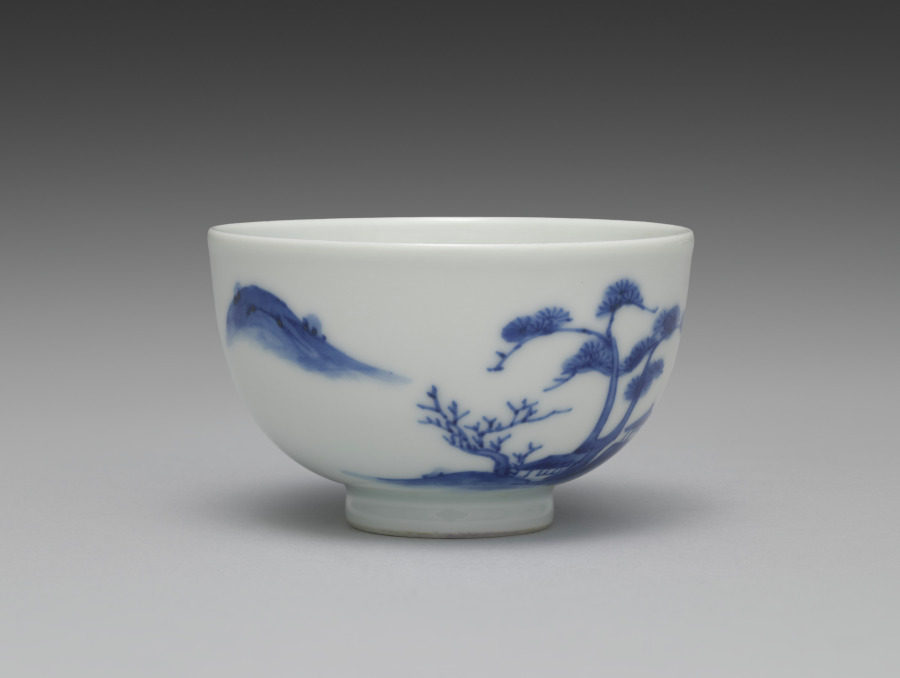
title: Teacup from Tea Set with Chinese Landscape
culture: Japan, Meiji period (1868–1912)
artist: Seifū Yohei III (Japanese, 1851–1914)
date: 1893–1914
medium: Porcelain with underglaze blue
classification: Ceramic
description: The theme of this sencha tea set is the Chinese scholar-recluse in an idyllic landscape. Each of the five teacups has a landscape with an architectural structure and some human activity. This tea set has a side-handled pot called a kyūsu, used for steeping, straining, and serving tea. Unlike some others, this set also has a yuzamashi, a container used to cool boiled water to just the right temperature for the best flavor when steeping. Seifū Yohei III’s painting teacher, Tanomura Chokunyū (1814–1907), made a visual record of famous sencha events that shows how these kinds of porcelains fit with objects such as a stove and kettle to form a complete set of utensils for tea preparation, and with ensembles of decorative objects meant to inspire creativity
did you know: This teacup shows a man with a staff walking away from a residence toward a boat, loaded with what might be a musical instrument wrapped for travel.